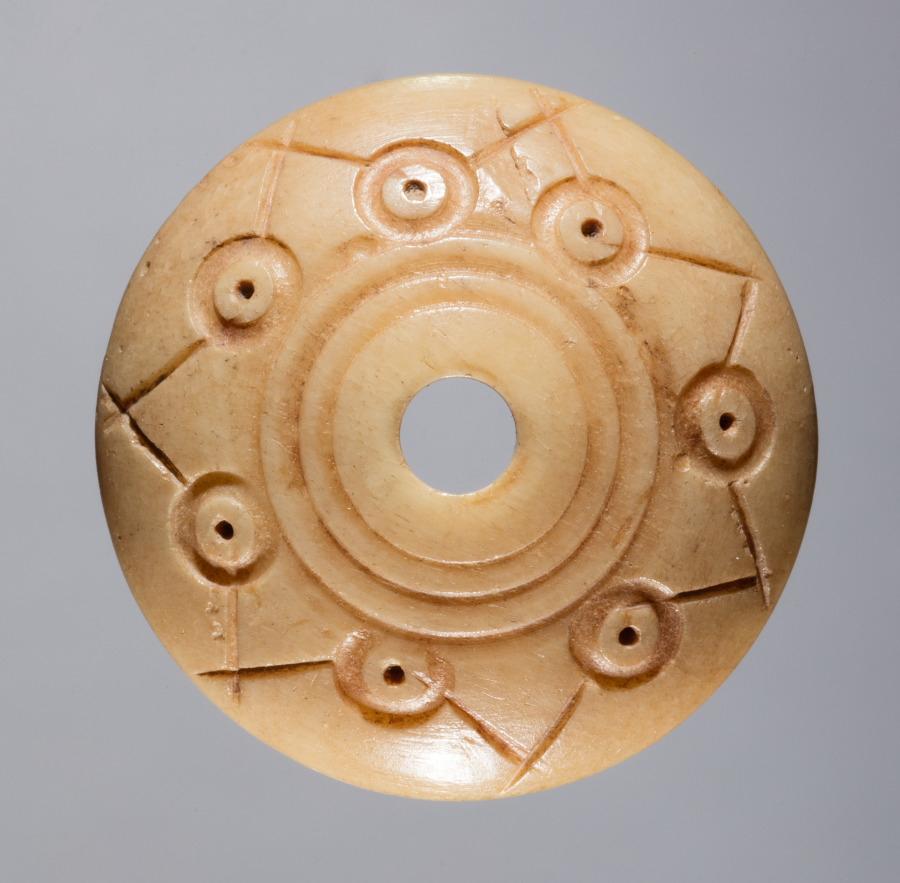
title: Spindle Whorl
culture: Iran, early Islamic period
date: 700s - 900s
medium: bone, incised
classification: Spindle Whorl